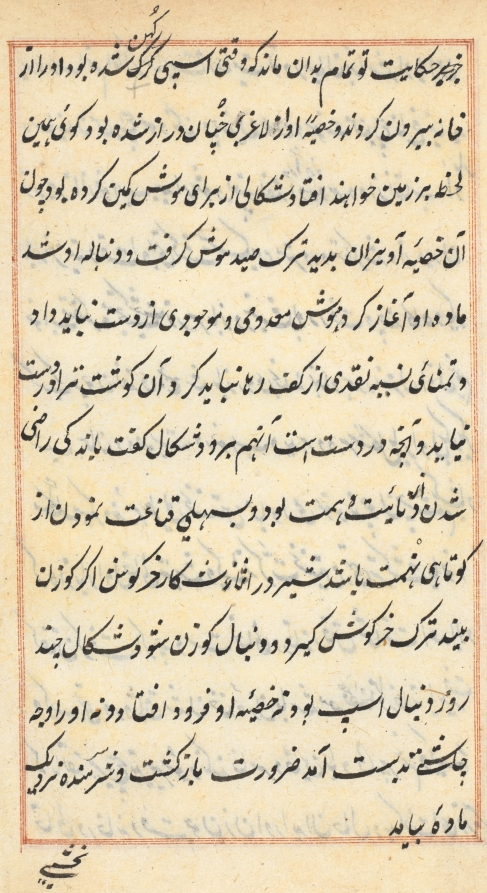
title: Page from Tales of a Parrot (Tuti-nama): text page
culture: Mughal India, court of Akbar (reigned 1556–1605)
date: c. 1560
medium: gum tempera, ink, and gold on paper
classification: Painting